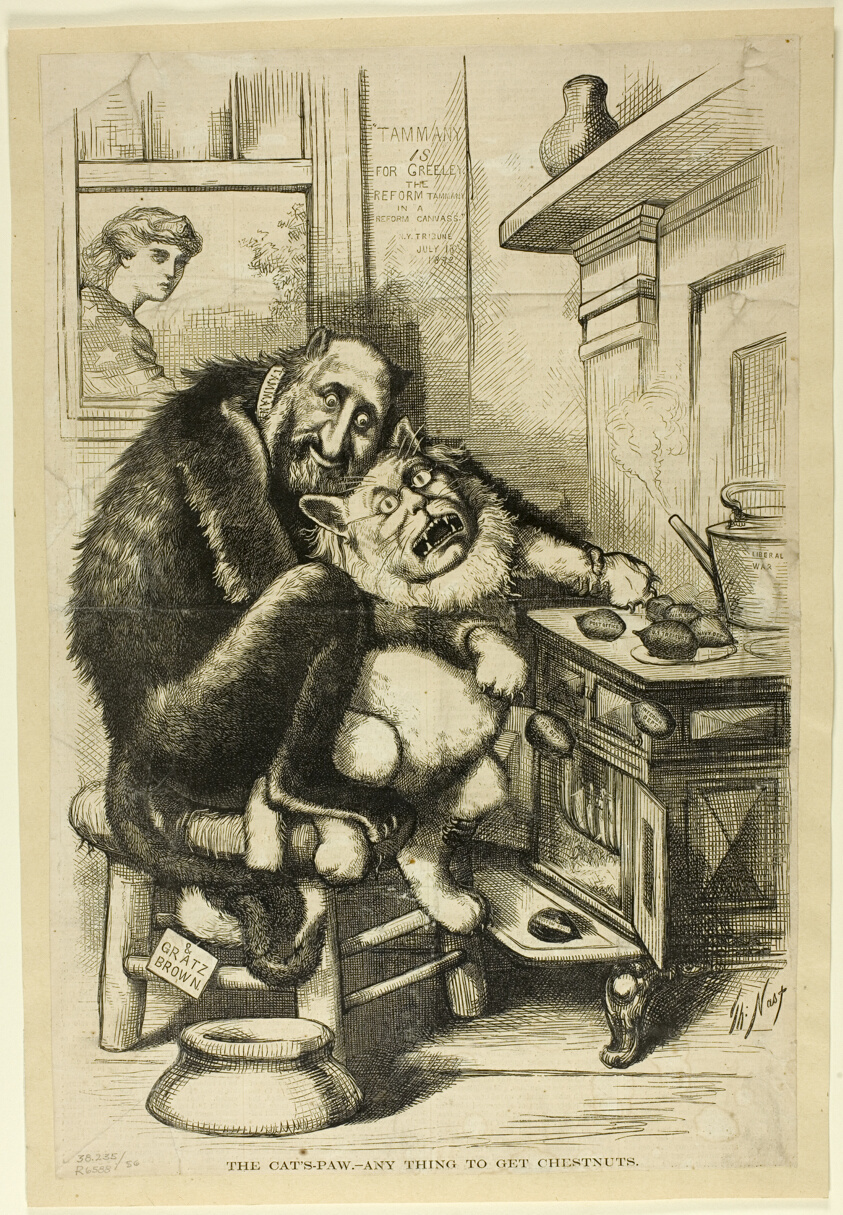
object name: Print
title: The Cat's-Paw, Any Thing to Get Chestnuts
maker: Thomas Nast (American, 1840-1902)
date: published July 18, 1892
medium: Lithograph on newsprint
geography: United States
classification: lithograph; print; prints and drawing